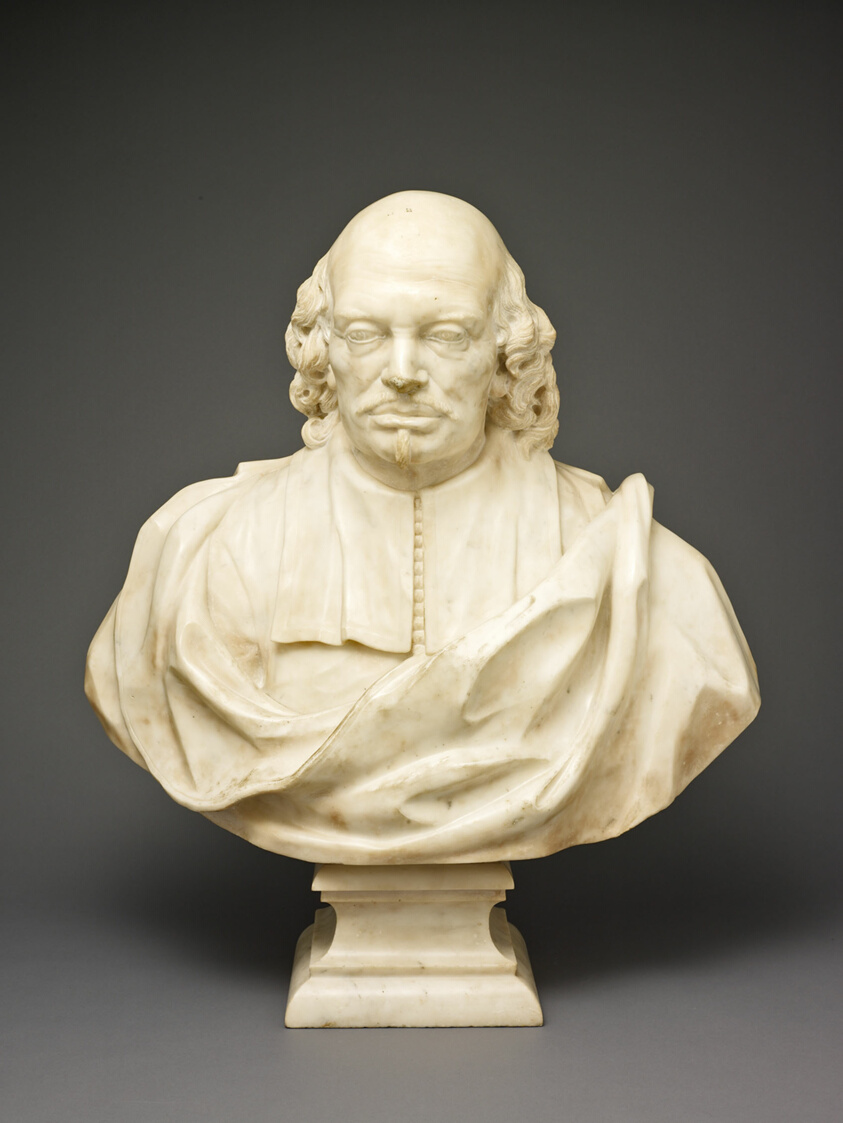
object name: Sculpture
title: Bust of Giovanni Battista de Luca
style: 17th Century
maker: Bernardo Fioriti (Bernardino or Focoso; Italian, active 1643–1674)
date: 1650/74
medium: Marble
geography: Italy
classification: bust/head; portrait; Italian; sculpture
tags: portraits: male subject, portraits, portrait, man, head, busts